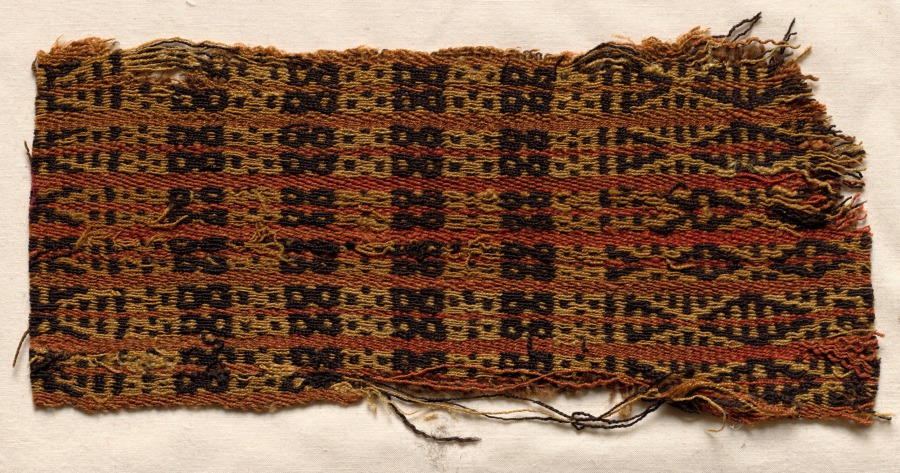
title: Textile fragment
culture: Pre-Columbian, 10th century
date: c. 900 A.D.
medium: camelid fiber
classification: Textile